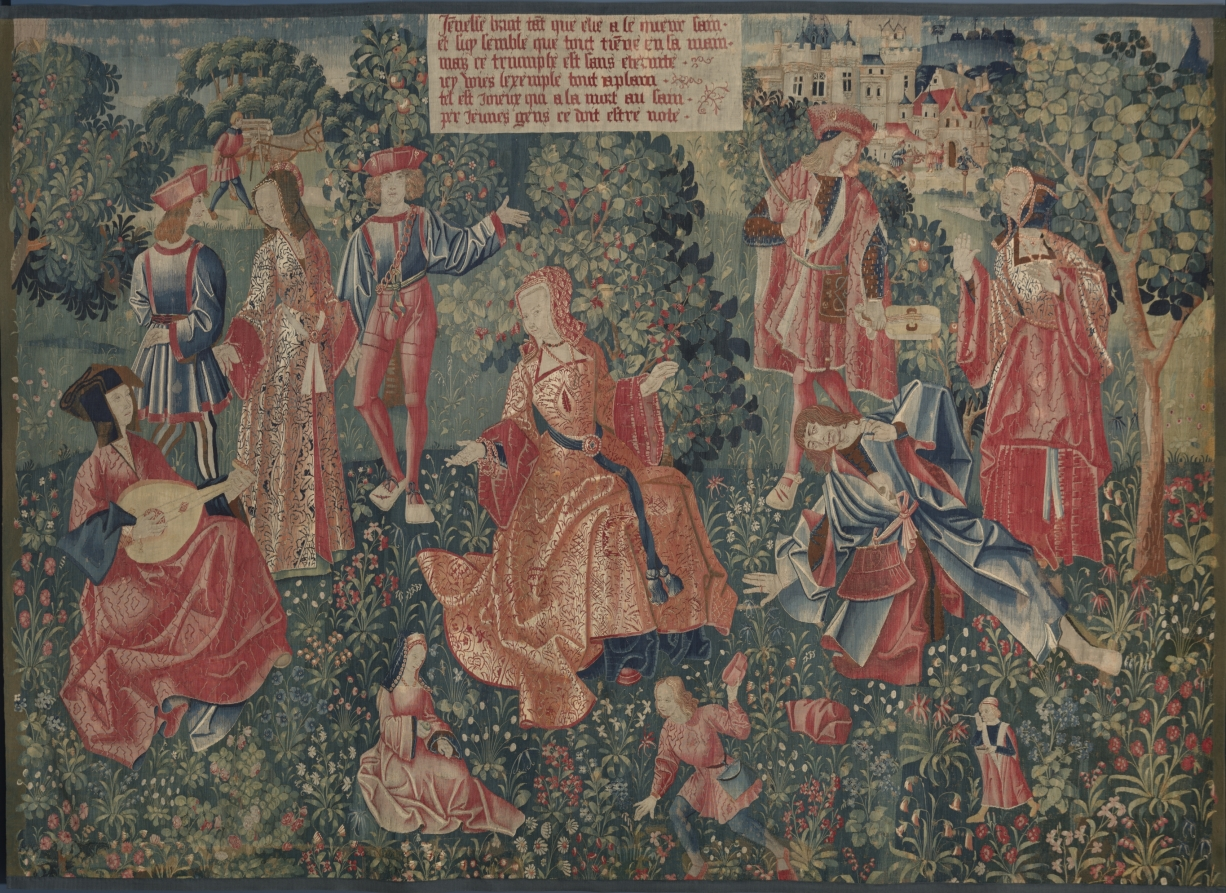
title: Youth (from Chateau de Chaumont set)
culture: France, Lyon(?), early 16th century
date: 1512–15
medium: silk and wool; tapestry weave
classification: Tapestry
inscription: French verse in Gothic letters translates as follows: Youth triumphs while its heart is healthy, And when it seems to hold all in its hand. But this triumph is without eternity. Here one sees the example full well: Those who are happy hide death in thier heart. Let the young heed this warning.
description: Louise of Savoy (1476-1531), queen mother of King Francis I, is depicted here in a sumptuous brocaded velvet in the center. She addresses youthful figures including Éléonore, Pierre Sala’s daughter who is facing her future husband, Hector. On the right, King Louis XII (died 1514) stands in front of the Chateau Langais where he had married Anne of Brittany. Above is Hector’s deceased father with a partially concealed skull under his robe, while a woman expresses surprise at the sight. The verse in Old French at the top states that youthful happiness is not eternal: Youth makes sounds as long as its heart is healthy, And thinks that it holds all in its hand. But this triumph is not eternal. Here you see clearly an example: He that is happy has death in his breast. Of this you people should take note.